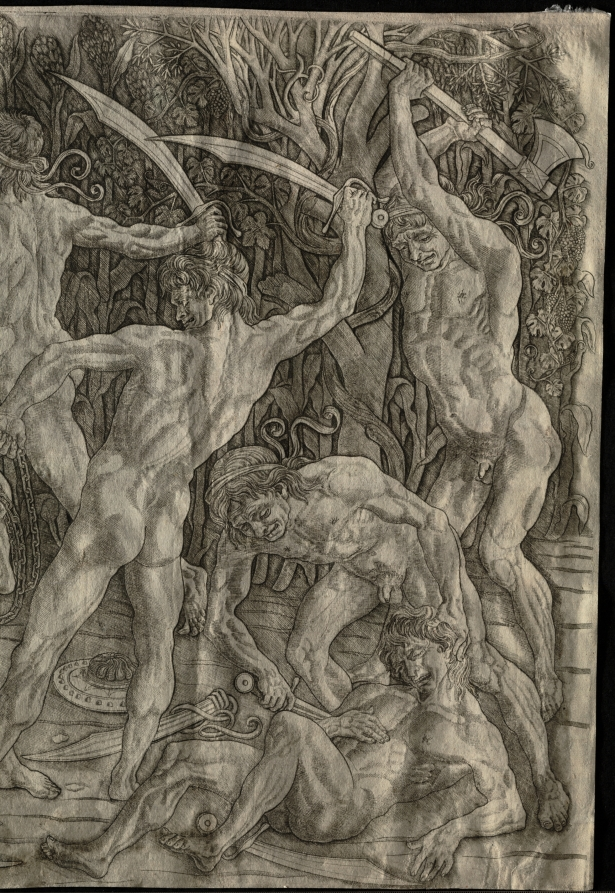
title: Battle of the Nudes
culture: Italy, 15th century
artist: Antonio del Pollaiuolo (Italian, 1431/32–1498)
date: 1470s–80s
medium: engraving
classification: Print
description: This engraving is one of the earliest Renaissance prints to portray the nude male body in action. Antonio del Pollaiuolo’s grimacing warriors appear like clones in different poses. The print may have functioned as a model for workshop apprentices studying human anatomy while learning to draw; however, the artist’s Latin signature suggests it also had an audience educated in literature. Art historians remain uncertain whether Pollaiuolo intended to depict a particular story or historical event. It is possible he created a deliberately ambiguous allegory that would appeal to patrons interested in interpreting symbols. For example, the continuous chain shared by the two central men could refer to an ancient idea that the body is the chain of the soul, only to be released in death.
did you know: Considered a groundbreaking work in the history of the Italian Renaissance, the CMA holds the only known impression of the print's first state.